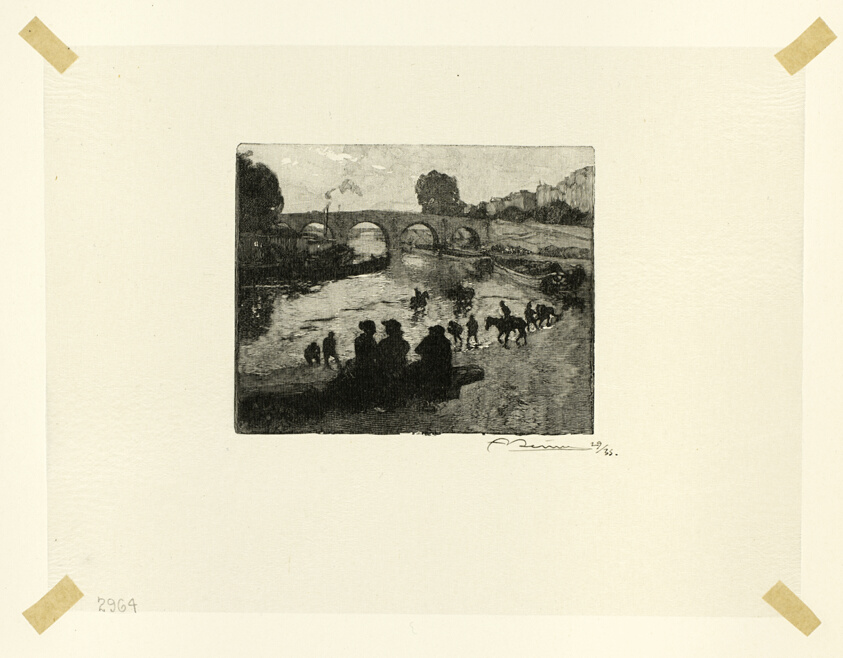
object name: Print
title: The Horse Pond at the Pont Marie, plate ten from Le Long de la Seine et des Boulevards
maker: Louis Auguste Lepère (French, 1849-1918); published by A. Desmoulins (French, active c. 1908-1910)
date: 1890, published 1910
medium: Wood engraving in black on cream Japanese tissue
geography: France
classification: wood engraving; print; prints and drawing